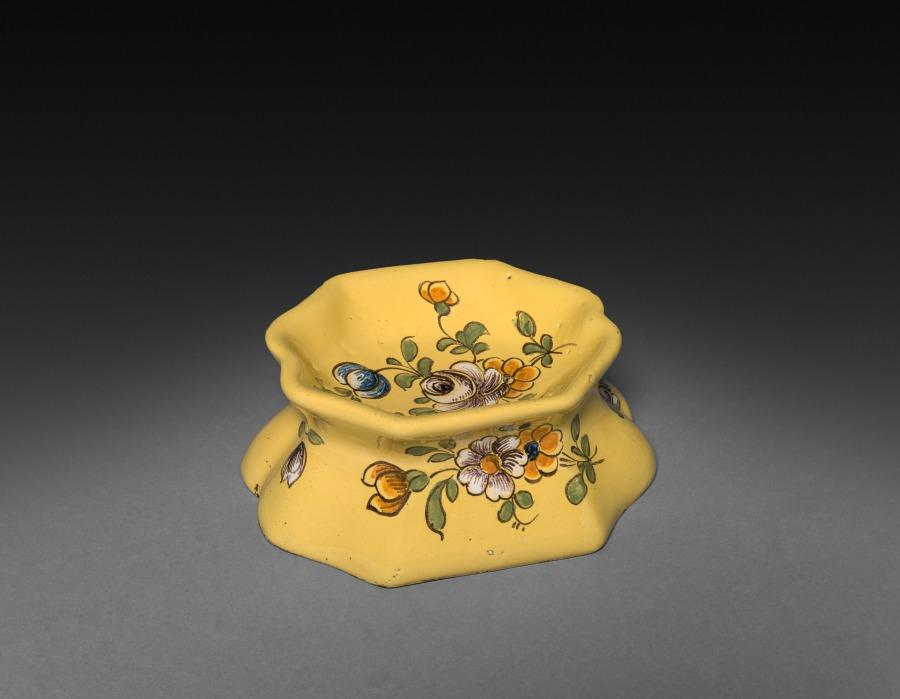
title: Salt Dish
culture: France, Moustiers, 18th century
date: c. 1775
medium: faience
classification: Ceramic